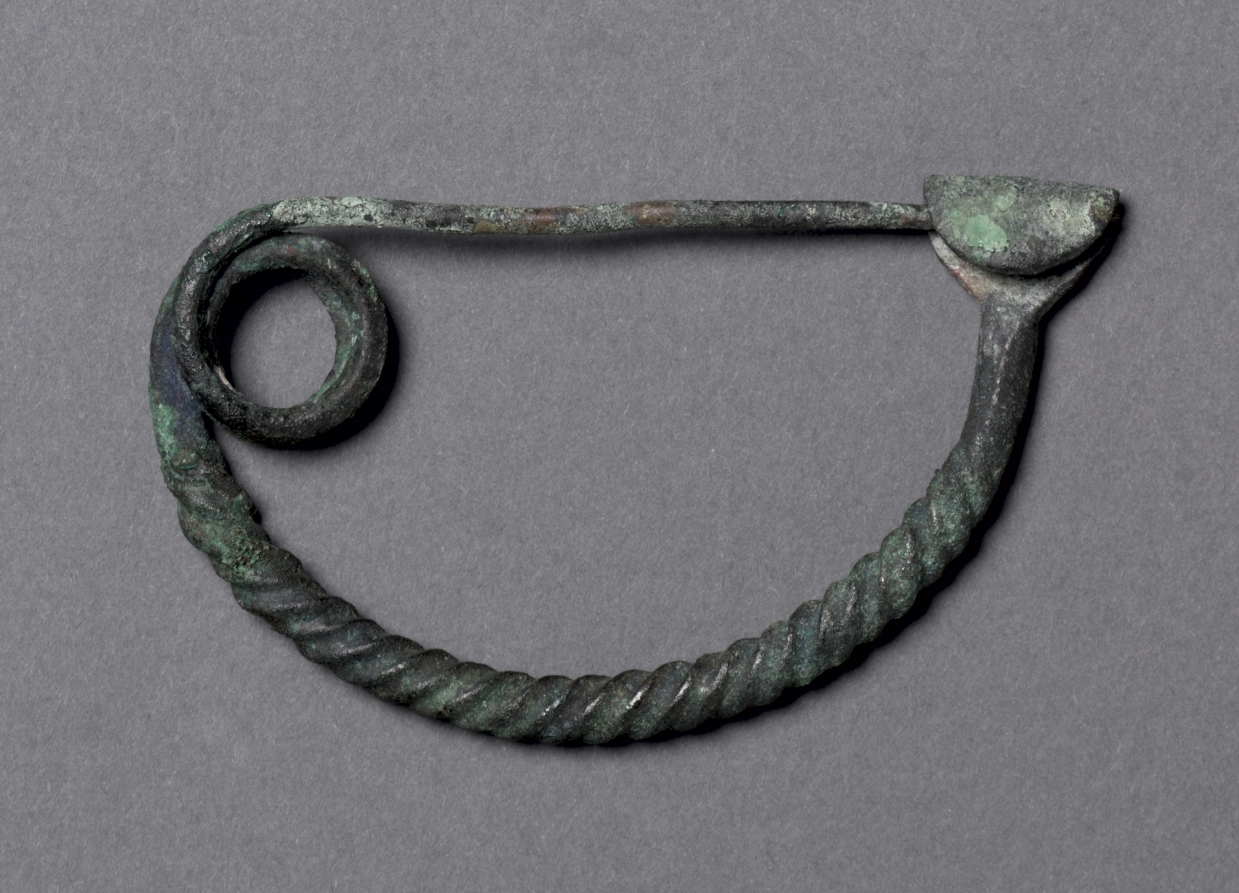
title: Fibula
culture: Italy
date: c. 900–800 BCE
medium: bronze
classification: Jewelry